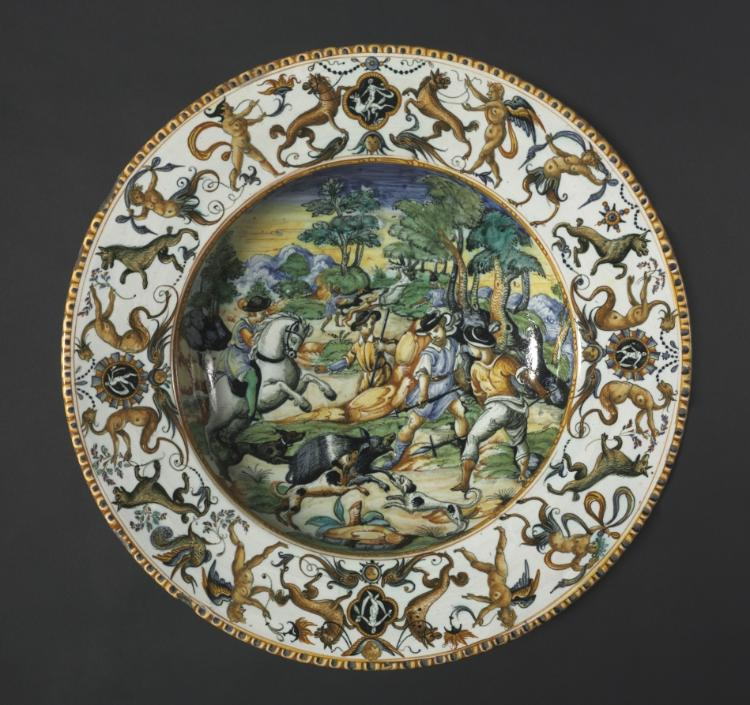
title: Charger Depicting a Boar Hunt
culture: Italy, Urbino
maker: circle of Fontana Family (Italian)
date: c. 1575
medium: tin-glazed earthenware (maiolica)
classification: Ceramic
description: During the Renaissance, an understanding of classical antiquity was perceived to be a sign of social, intellectual, and economic distinction. Scenes from Greco-Roman mythology were prominently featured on maiolica, covering the surface in a style called istoriato (decorated with stories).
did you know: In the centuries leading up to the Renaissance, boar hunting was an activity reserved for royalty and the aristocracy.